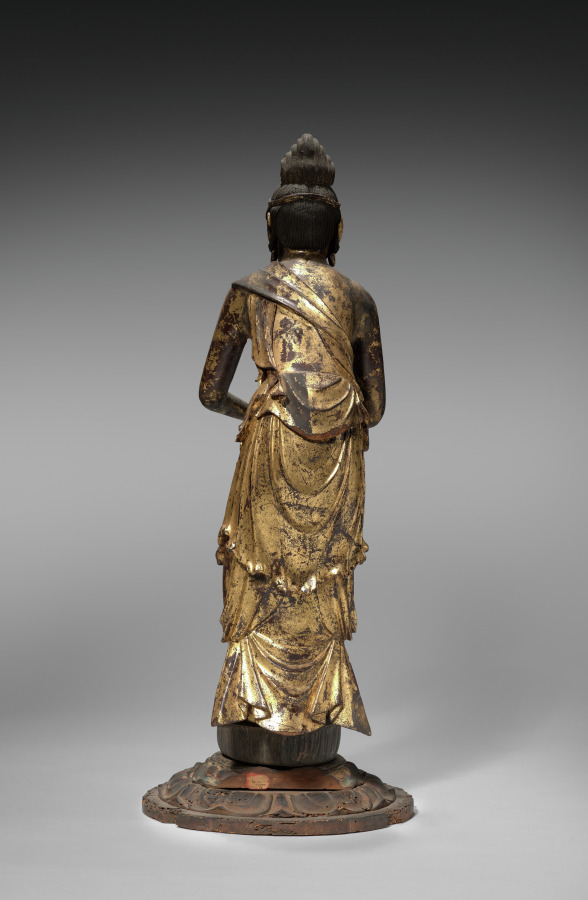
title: Kannon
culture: Japan, Kamakura period (1185–1333)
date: early 1200s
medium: wood with lacquer and gold leaf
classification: Sculpture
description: Kannon, the bodhisattva of compassion, is one of the two bodhisattvas attending Amida, the Buddha of the Western Paradise. The sculpture stands on a lotus pedestal, holding a lotus dais on which the soul of the faithful is received into paradise. The use of gold was prevalent in Buddhist art during this time—it was believed that the yellow light permeated the regions of the Amida—and Amida worship prevailed throughout Japan.